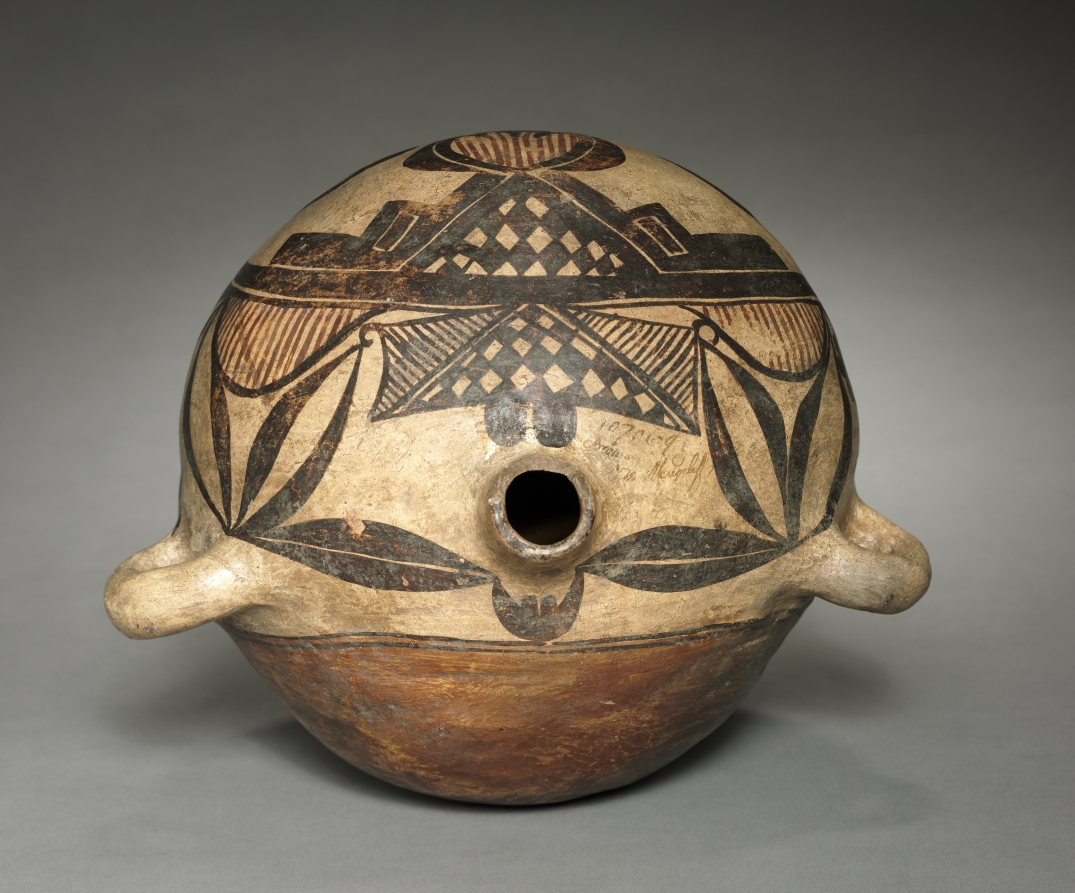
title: Canteen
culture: Native North America, Southwest, Arizona, Pueblo, Hopi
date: 1870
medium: ceramic, slip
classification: Ceramic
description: Since the 1500s, Hopi women made big-bellied canteens, based on Spanish prototypes, and used them to carry water. By the late 1800s, canteens became popular with Euro-American tourists, who increasingly flocked to the Southwest in search of encounters with “exotic” Native American cultures. Thus, Hopi artists embellished their wares to improve their appeal, here with graceful abstract forms.